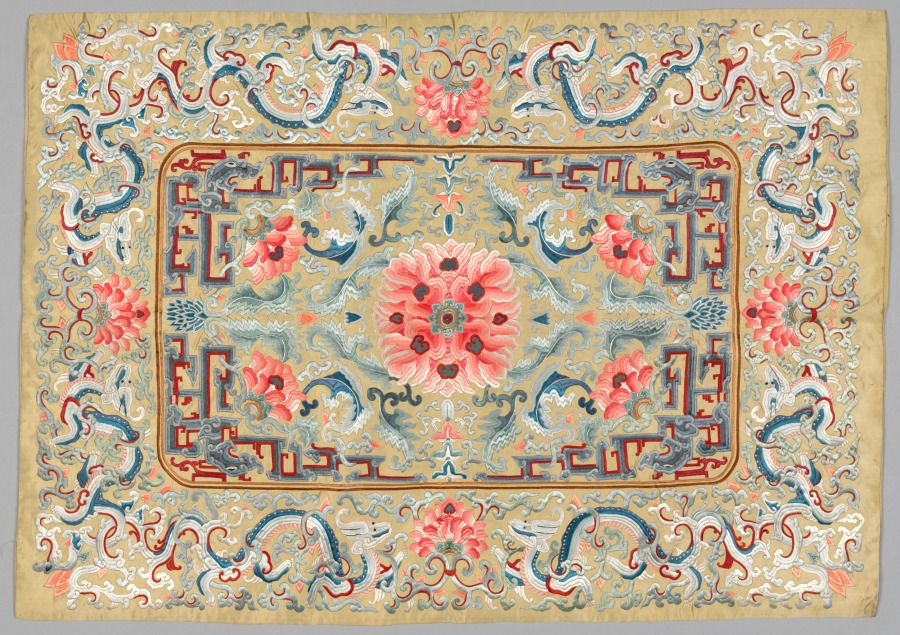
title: Embroidered Square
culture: China, late 19th century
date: late 1800s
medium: embroidery, silk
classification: Embroidery